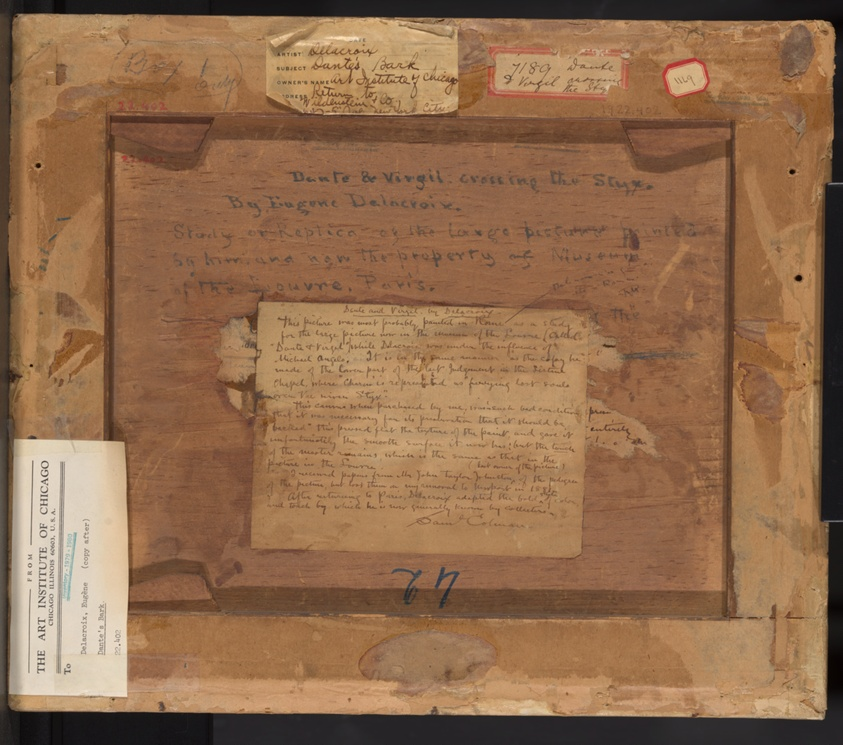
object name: Painting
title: Dante's Bark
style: 19th century, nineteenth century, romantic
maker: After Eugène Delacroix (French, 1798–1863)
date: c. 1840–60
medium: Oil on canvas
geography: France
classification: painting; oil paintings (visual works); paint; france; french; oil on canvas; european painting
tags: travel, boatman, boats, cities, death, France, French, Greek, Greek mythology, men, poetry, smoke, storms, water, wind, Century of Progress, world's fairs, Chicago World's Fairs